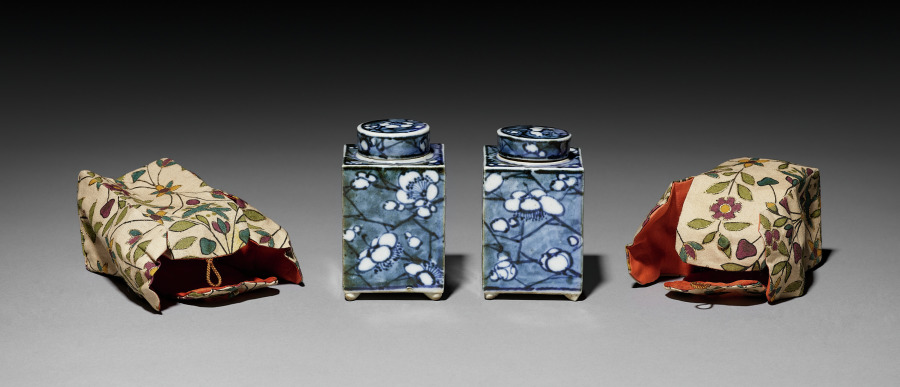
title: Pair of Tea Containers with Plum Blossoms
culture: Japan, Edo period (1615–1868)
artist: Aoki Mokubei (Japanese, 1767–1833)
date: early 1800s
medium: porcelain with underglaze blue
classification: Ceramic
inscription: signed "Ro Mokubei" on base in underglaze blue.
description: Aoki Mokubei, born into a family of restaurateurs, was a potter, calligrapher, painter, and scholar, and is considered one of the three masters of later Edo period Kyoto ceramics. He specialized in porcelains fashioned after Chinese prototypes, and created works for steeped tea (sencha) such as these matching tea caddies decorated in an underglaze blue called sometsuke—literally “with applied dye.” He signed them on their bottoms. They also have intricately patterned silk sleeves to both beautify and protect them. On the exterior of the lid of the outer wooden box that contains them, it is written that Mokubei inscribed and painted an image on the box. On the interior of the lid, the signature and seals of a former owner are written. Mokubei has signed the lid of the inner box, and a charming ink and light color composition of West Lake in Hangzhou in China covers its three sides. On the fourth side is a long inscription by Mokubei describing the scene.